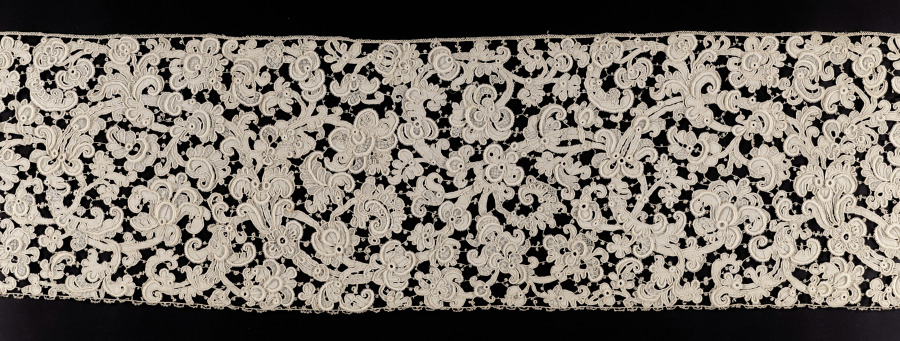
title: Lace Bed Valance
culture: Italy, Venice, 1660-1699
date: 1660–1699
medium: Needle lace (Venetian Raised Point)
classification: Lace